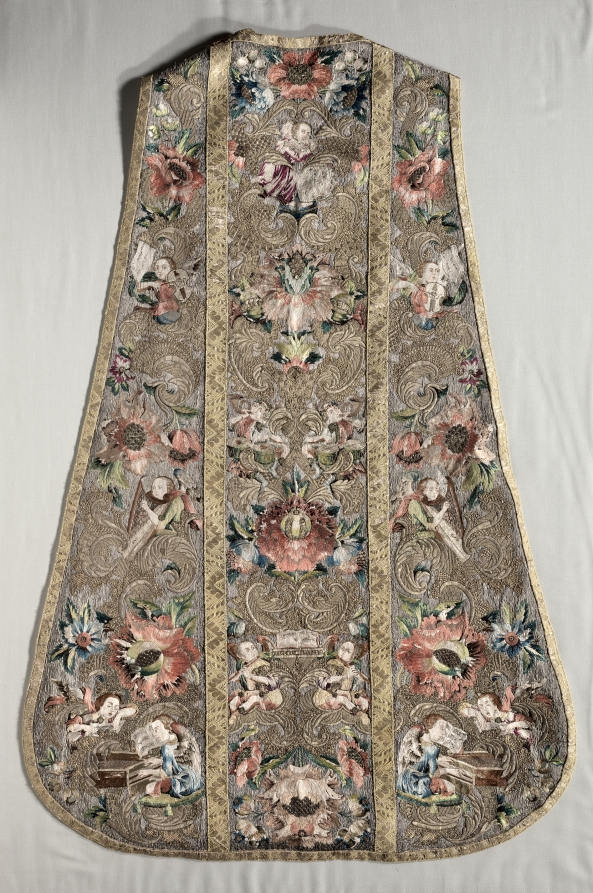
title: Chasuble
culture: Germany, Bavaria, last quarter of 17th century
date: 1675–99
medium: Silk and metallic threads on silk tabby sewn down on a linen tabby ground; embroidery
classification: Embroidery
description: This rare chasuble decorated with angels, musicians, pomegranates, and flowers represents Sacred and Profane Love. This is indicated by two figures—a clear-sighted figure embracing a blindfolded figure—standing on a globe in the upper center and also by the musicians. The angels play soft-sounding instruments (harpsichords, harps, viole da barccio, and flutes) while earthy figures play loud instruments (tambours and hunting horns). The chasuble was most likely part of a liturgical set commissioned for a wedding. This entire chasuble is embroidered with silk and metal thread laid over linen and stitched in place. The exceptionally fine workmanship, lavish use of gold and silver, and brilliant silk thread create this sumptuous vestment.